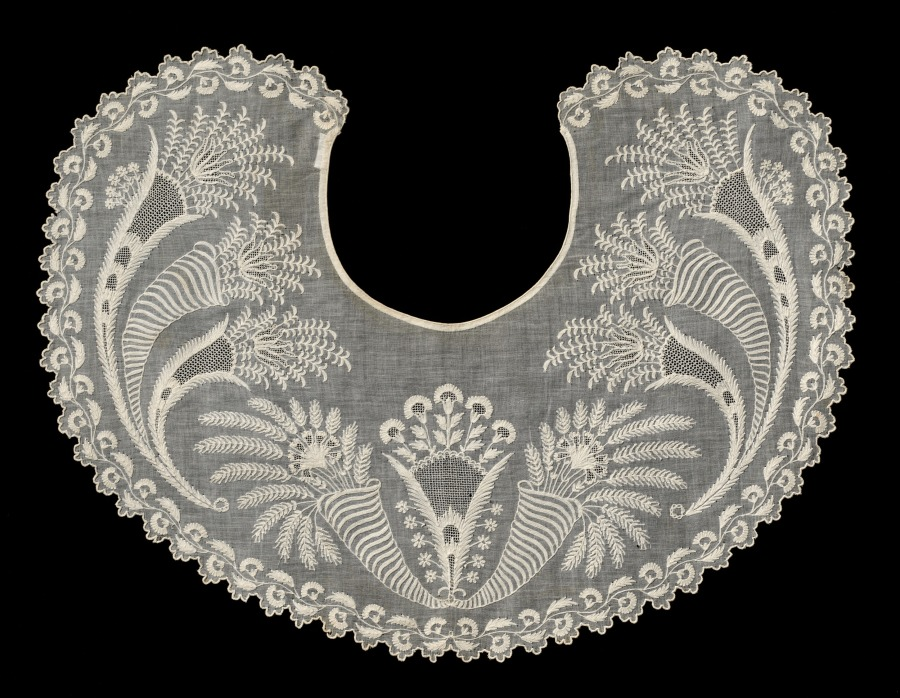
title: Collar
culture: America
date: 1810–40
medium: Plain weave cotton: lace (drawn work) and chain stitch embroidery (tambour work)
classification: Embroidery